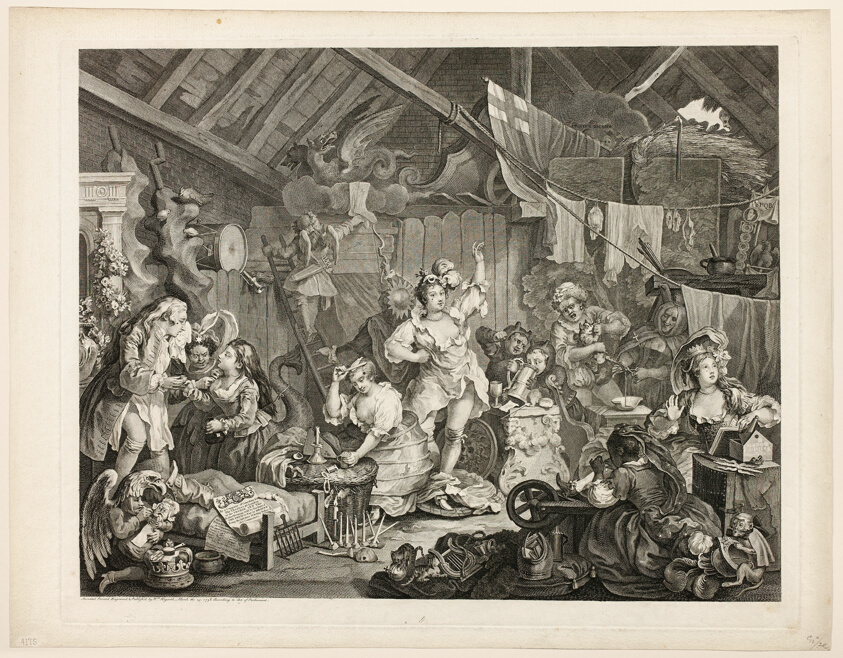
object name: Print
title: Strolling Actresses Dressing in a Barn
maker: William Hogarth (English, 1697-1764)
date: May 1738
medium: Engraving in black on ivory laid paper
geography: England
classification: engraving; print; prints and drawing